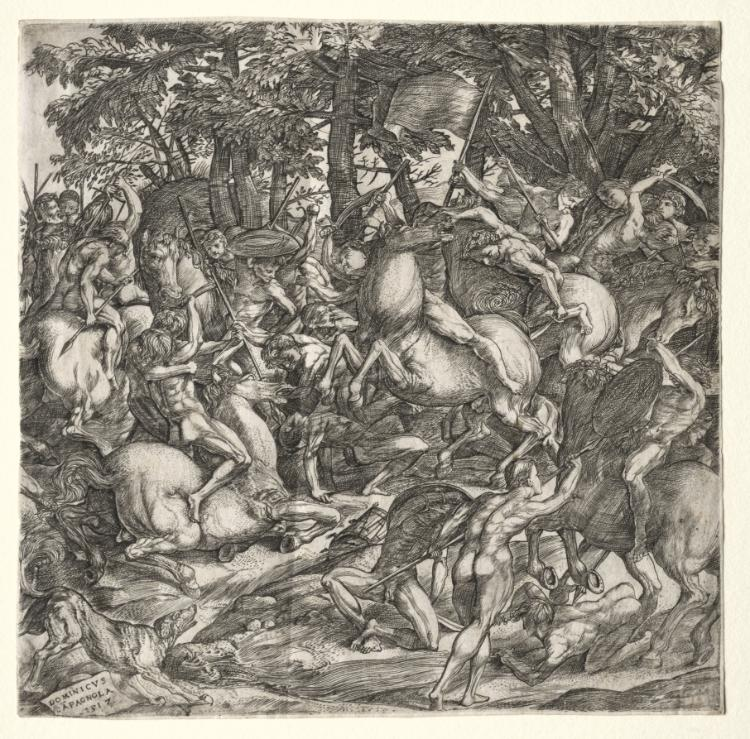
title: Battle of Naked Men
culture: Italy, 16th century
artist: Domenico Campagnola (Italian, 1500–1564)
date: 1517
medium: engraving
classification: Print